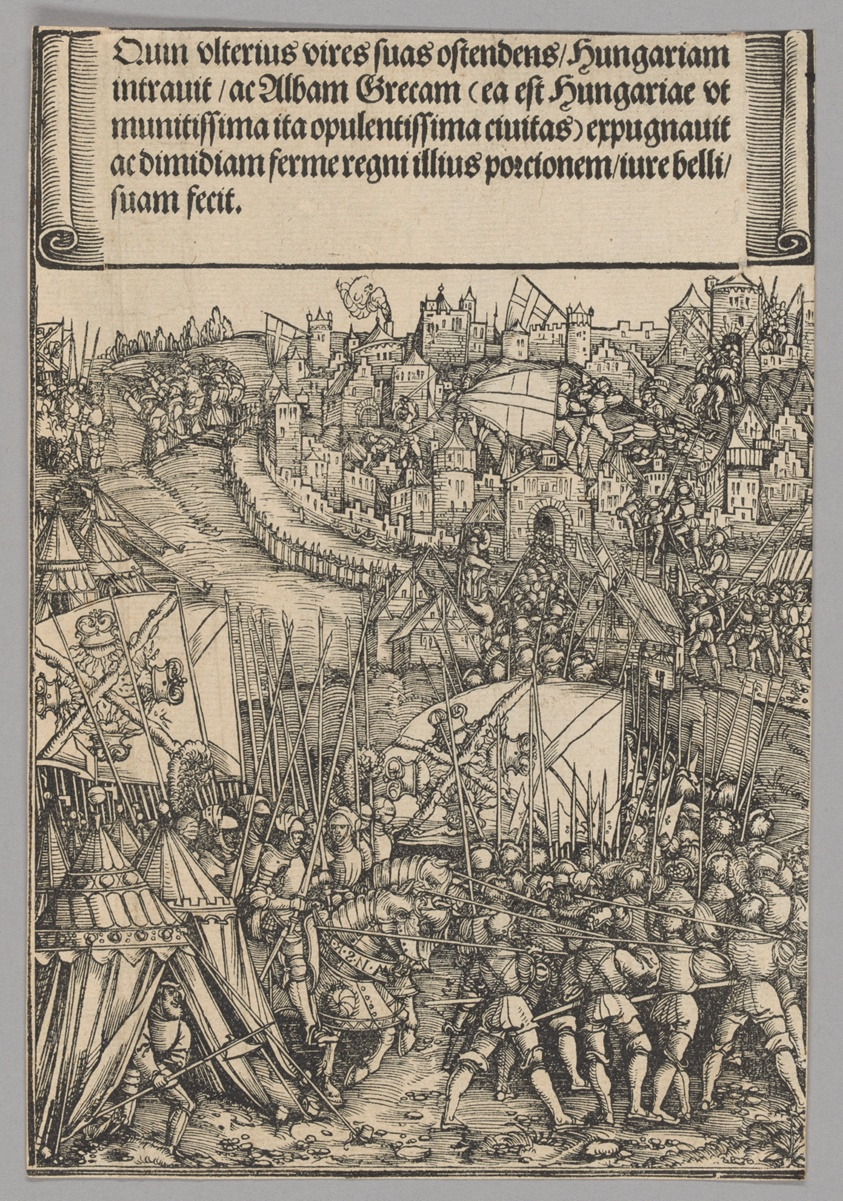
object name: Print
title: Hungarian Campaign, plate 14 from Historical Scenes from the Life of Emperor Maximilian I from the Triumphal Arch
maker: Hans Springinklee (German, c. 1495-after 1522); printed by Hieronymus Andreae (German, died 1556)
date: 1515-17, printed c. 1520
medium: Woodcut in black ink on cream laid paper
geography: Germany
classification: print; paper; woodcut; prints and drawing